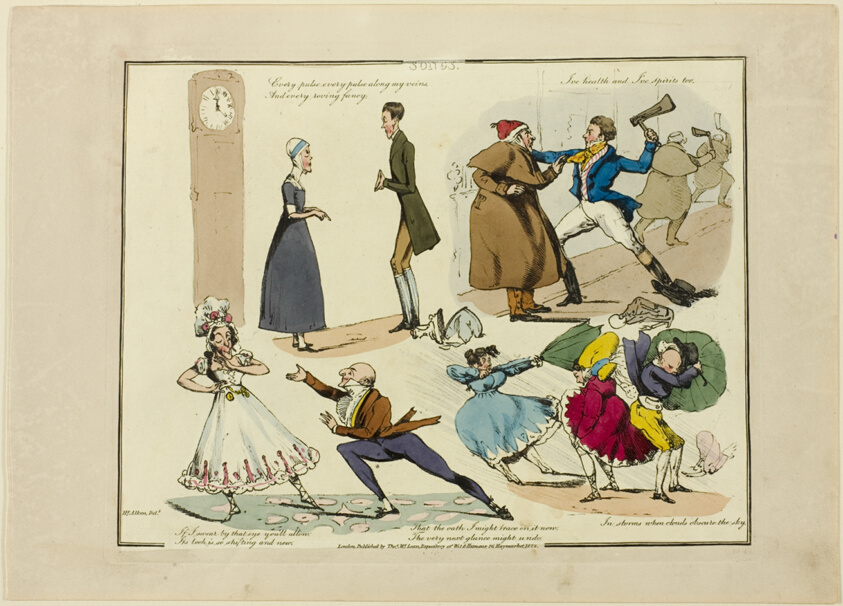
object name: Print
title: Plate from Illustrations to Popular Songs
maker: Henry Alken (English, 1785-1851); published by Thomas McLean (English, active 1790-1860)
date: 1822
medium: Soft ground etching with hand-coloring and aquatint on paper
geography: England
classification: etching; print; prints and drawing